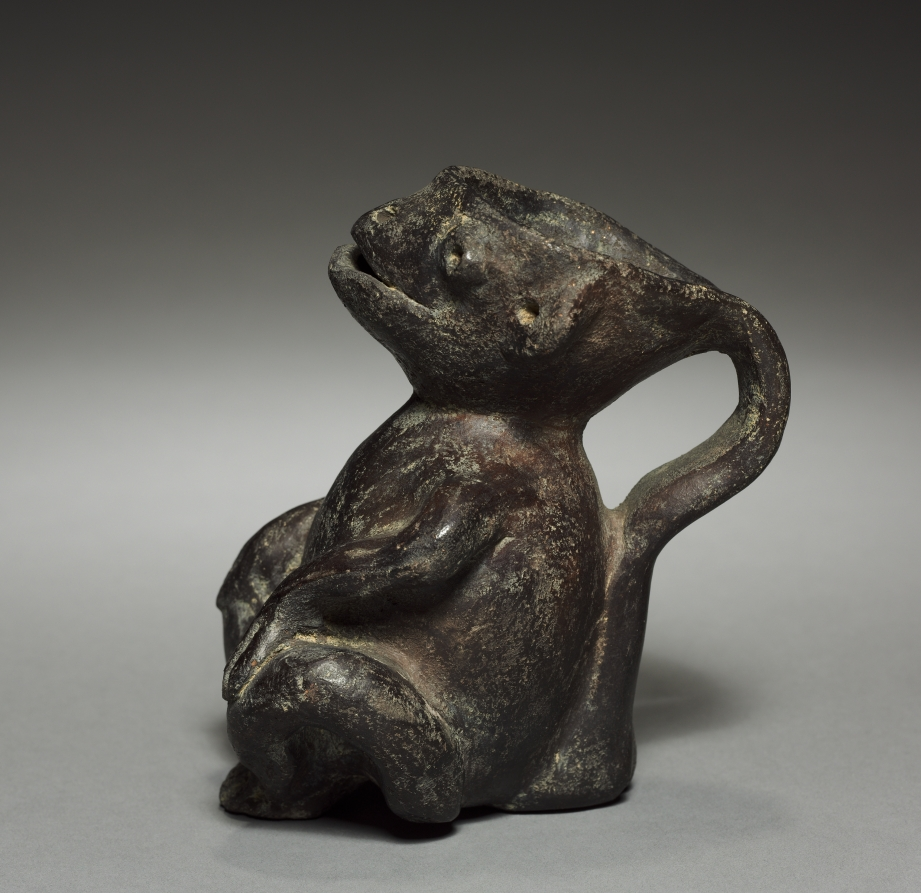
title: Seated Figure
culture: Colombia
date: before 1921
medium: pottery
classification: Ceramic